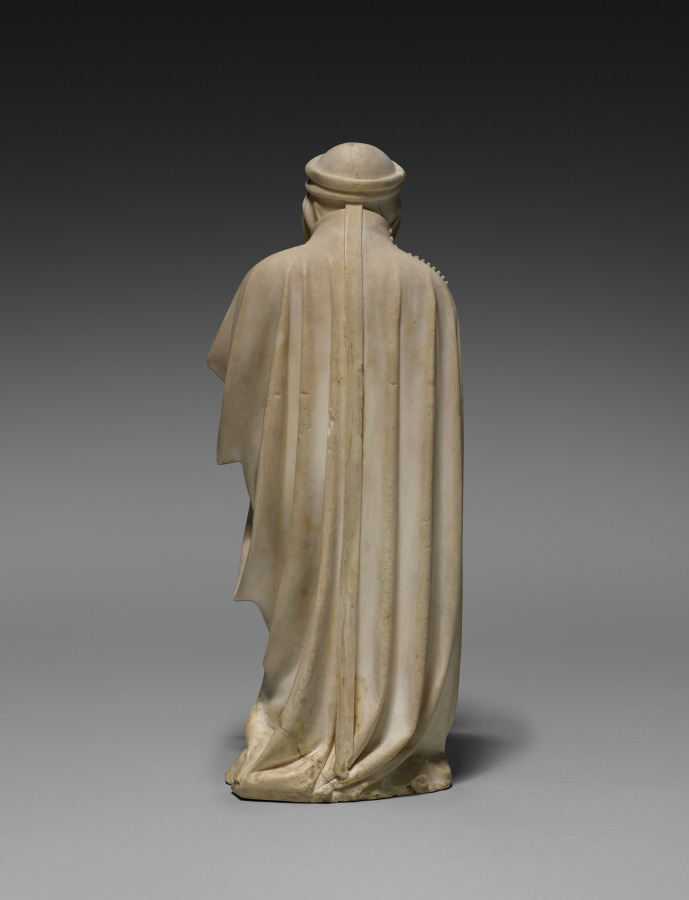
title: Mourner from the Tomb of Philip the Bold, Duke of Burgundy (1364–1404)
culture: Netherlands, active Dijon, 15th century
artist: Claus de Werve (Netherlandish, 1380–1439)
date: 1404–1410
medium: vizille alabaster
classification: Sculpture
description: This figure comes from the tomb of Duke Philip the Bold from the church of Champmol near Dijon (Burgundy, France). Philip, who founded the monastery and designated it as his burial place, hired the best artists, many of whom came from the Netherlands. While the commission was given in 1381, the work was not completed until 1410, six years after the duke’s death. This mourner is unusual for the time because it is not carved as a static low relief on the pedestal of the tomb but interacts with the viewers and their fellow procession members. The lifelike quality of the figure is due in large part to the alabaster. Its softness allowed artists to carve details into the material, and the transparent, milky white stone could also be polished to a high gloss.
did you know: During his life, Duke Philip founded the monastery of Chartreuse de Champmol to serve as a final resting place for himself and his family.